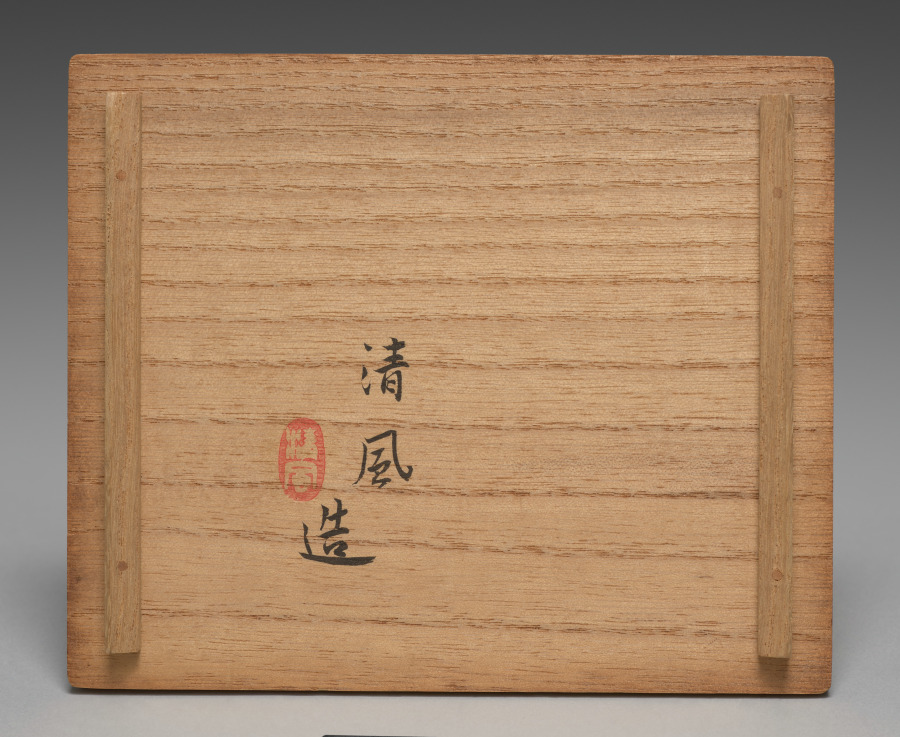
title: Dishes with Shells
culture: Japan, Taishō period (1912–26)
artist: Seifū Yohei IV (Japanese, 1872–1951)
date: 1914–46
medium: Set of five dishes; porcelain with blue glaze, iron oxide, and molded design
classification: Ceramic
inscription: 清風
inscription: 清風造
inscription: 清風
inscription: 成山清風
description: Yohei IV chose an aquatic theme for this set of five mukōzuke, side dishes. He added an iron oxide rim and used a concentrated blue glaze on both the interior and exterior. The glaze, named on the box lid, is his father’s “evening moon” (tsukiyoi) color. The conch in relief takes up the entire bottom of the dish. Up the sides are two snails on one end and on the other a scallop. This results in a boldly graphic, less realistic effect.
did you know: This set of dishes, mukōzuke, could be used for serving small side dishes at a tea gathering.